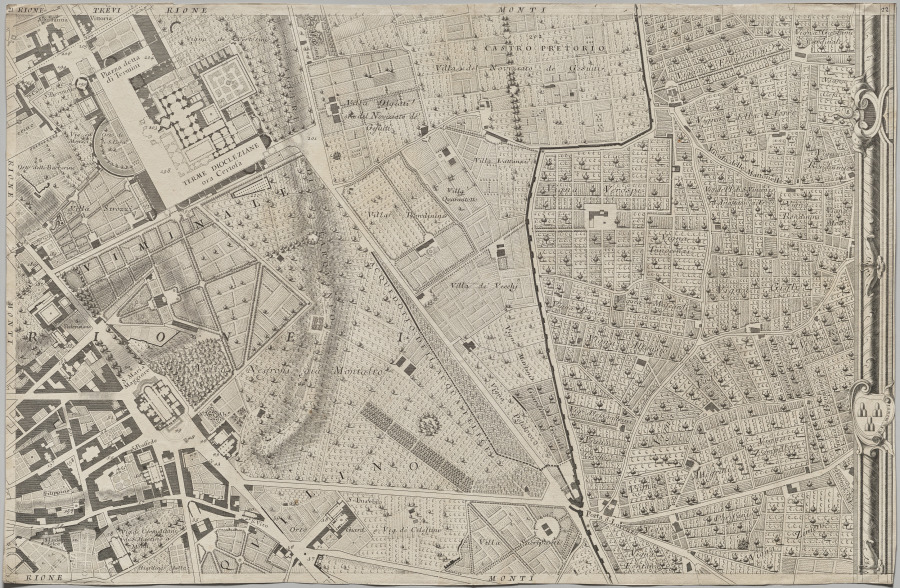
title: Nuova pianta di Roma data in luce da Giambattista Nolli l’anno MDCCXLVII, known as La Pianta Grande di Roma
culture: Italy, 18th century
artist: Giovanni Battista Nolli (Italian, 1701–1756)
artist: Carlo Nolli (Italian, 1690–1790)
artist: Rocco Pozzi (Italian, 1701–1774)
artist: Pietro Campana de Soriano (Italian, 1725–c. 1779)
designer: Stefano Pozzi (Italian, 1699–1768)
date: 1748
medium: etching and engraving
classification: Print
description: The monumental Pianta Grande di Roma, or Large Plan of Rome, which measures about 5 x 7 feet when its twelve plates are assembled, is a landmark in both cartography and printmaking. The map is considered the first scientific rendering of Rome, establishing new standards of accuracy and thoroughness when it was published in 1748. Devised by the Lombard architect and surveyor Giovanni Battista Nolli (Italian, 1701-56), the creation of the map required over ten years of surveying the city carried out by Nolli and a team of assistants with the help of new measuring devices. In Nolli’s “ichnographic” (also called “ground”) plan, architectural features and the urban infrastructure are reduced to a single horizontal slice, a minutely detailed footprint that conveys dimensions, proportions, and orientations to scale with the utmost clarity.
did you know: To make this map, Pope Clement XII granted the mapmaker permission to measure courtyards and other interior, inaccessible spaces in monastic communities, even those in nuns’ convents, which was controversial at the time.